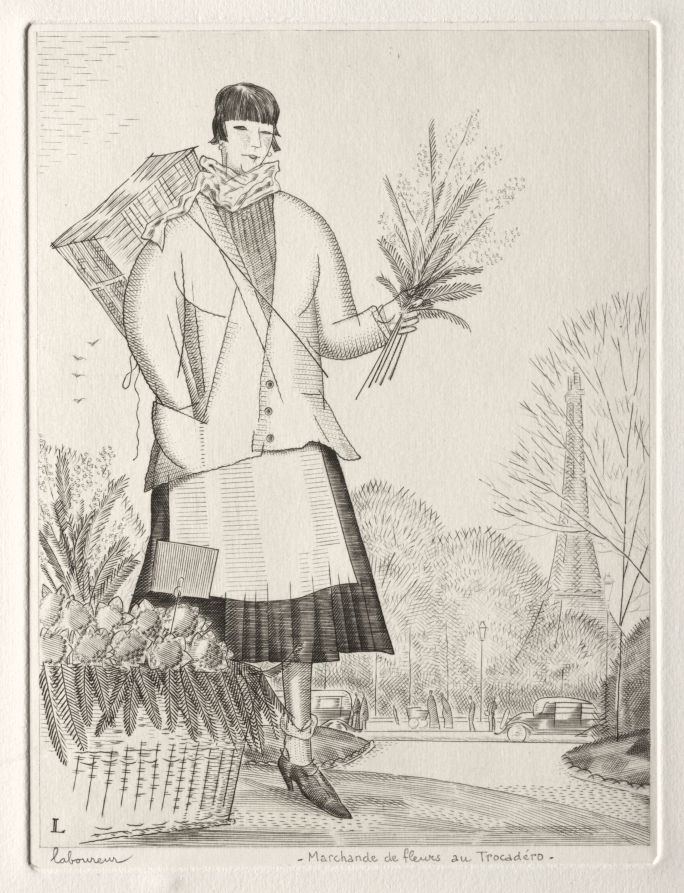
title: Flower Seller at the Trocadéro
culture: France, 20th century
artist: Jean-Émile Laboureur (French, 1877–1943)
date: 1931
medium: engraving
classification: Print